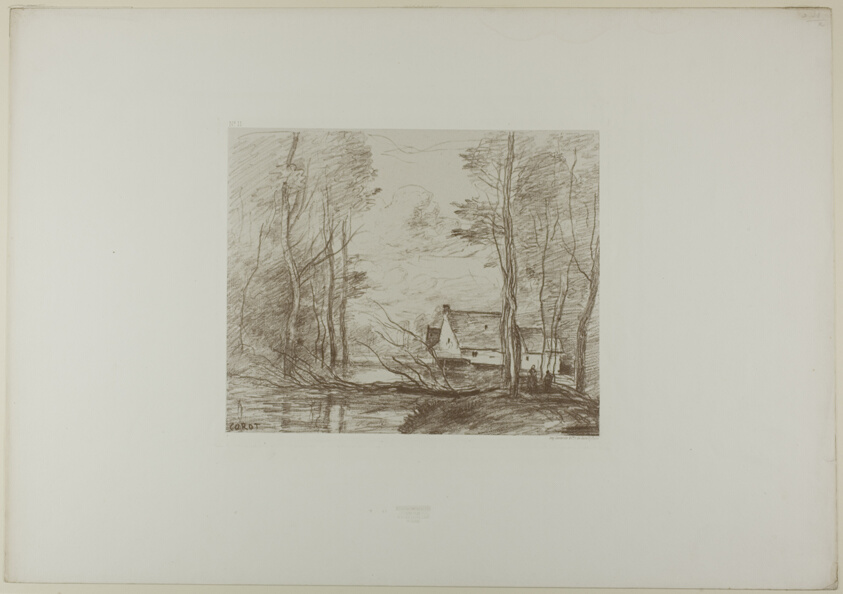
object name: Print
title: The Mill at Cuincy, Near Douai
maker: Jean-Baptiste-Camille Corot (French, 1796-1875); printed by Lemercier et Compagnie (French, 1825-1891)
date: 1871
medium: Transfer lithograph printed in brown on light gray China paper laid down on white wove paper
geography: France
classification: lithograph; print; prints and drawing